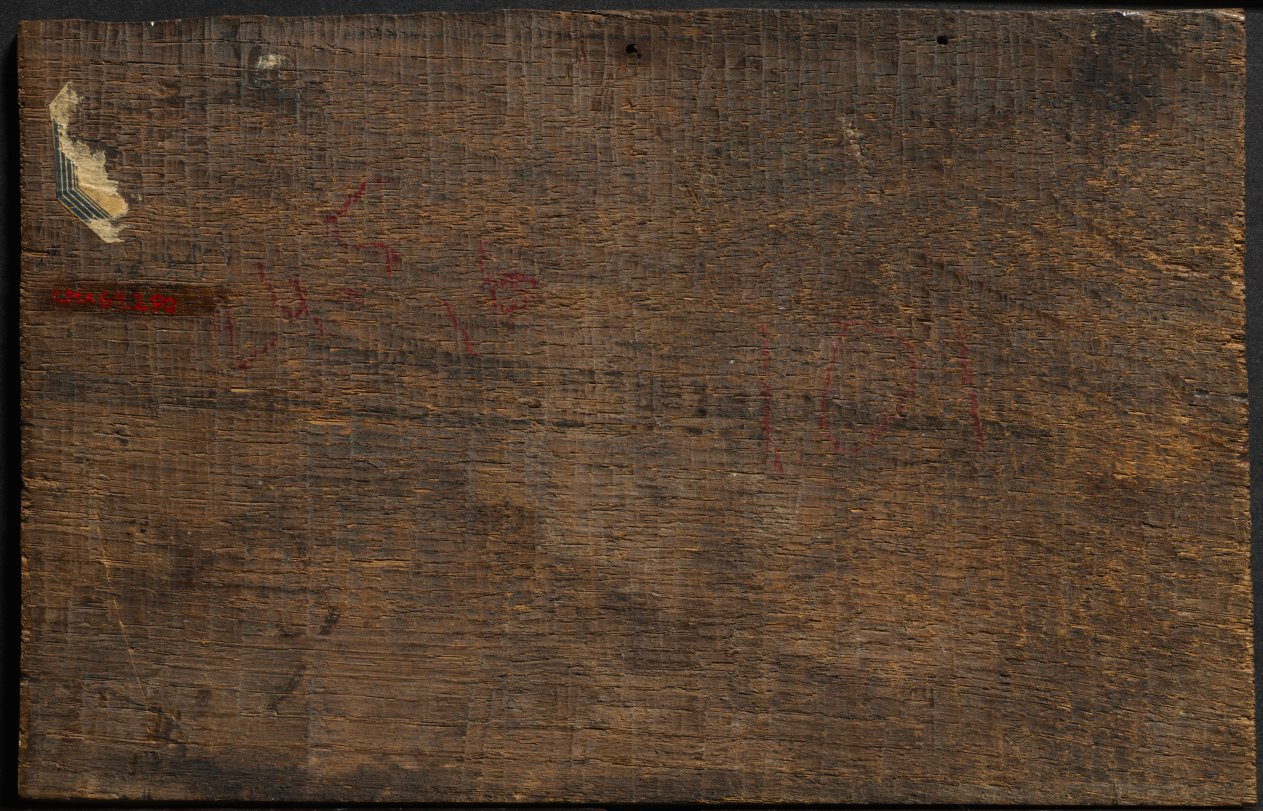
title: Marshlands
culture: France, 19th century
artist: imitator of Théodore Rousseau (French, 1812–1867)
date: not dated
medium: oil on wood panel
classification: Painting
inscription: Signed lower left: TH. Rousseau